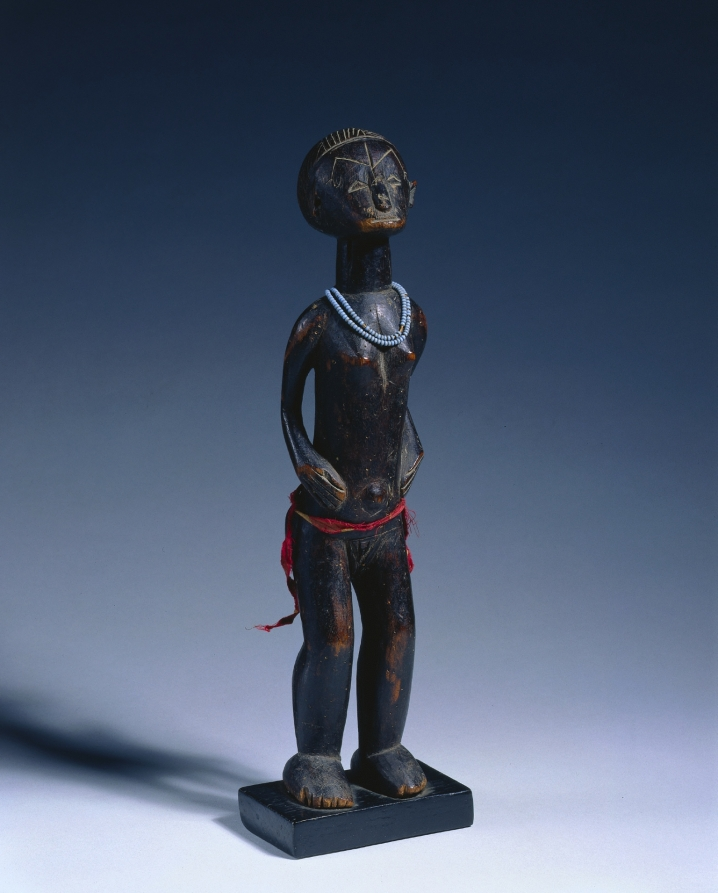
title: Female Figure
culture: Democratic Republic of the Congo, Tabwa, late 19th or early 20th century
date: 1900s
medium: Wood, cloth, glass beads, and natural fiber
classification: Sculpture